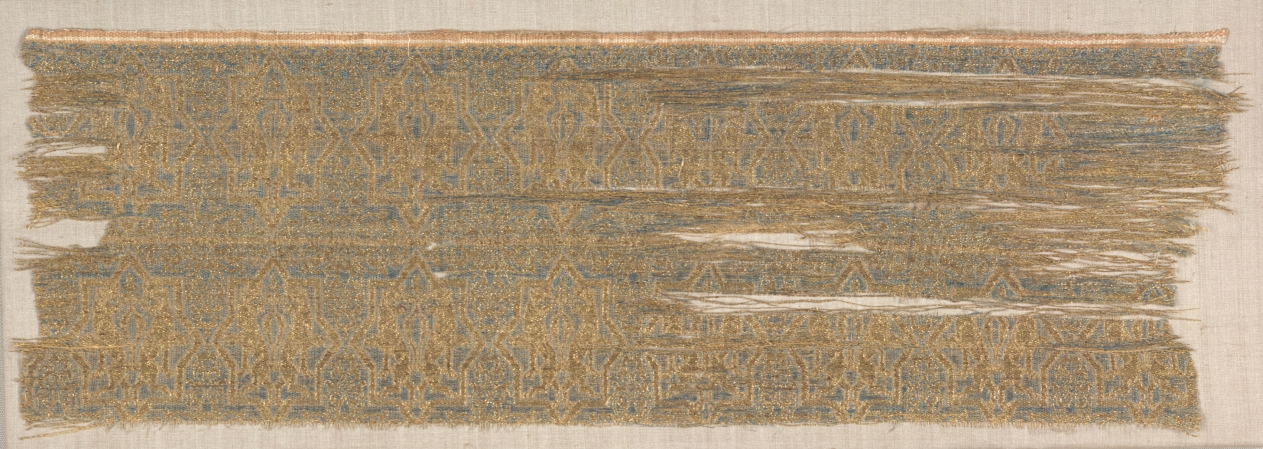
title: Taqueté fragment with star and cross pattern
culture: Spain, probably Almeria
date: 1200s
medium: taqueté: silk and gold thread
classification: Textile